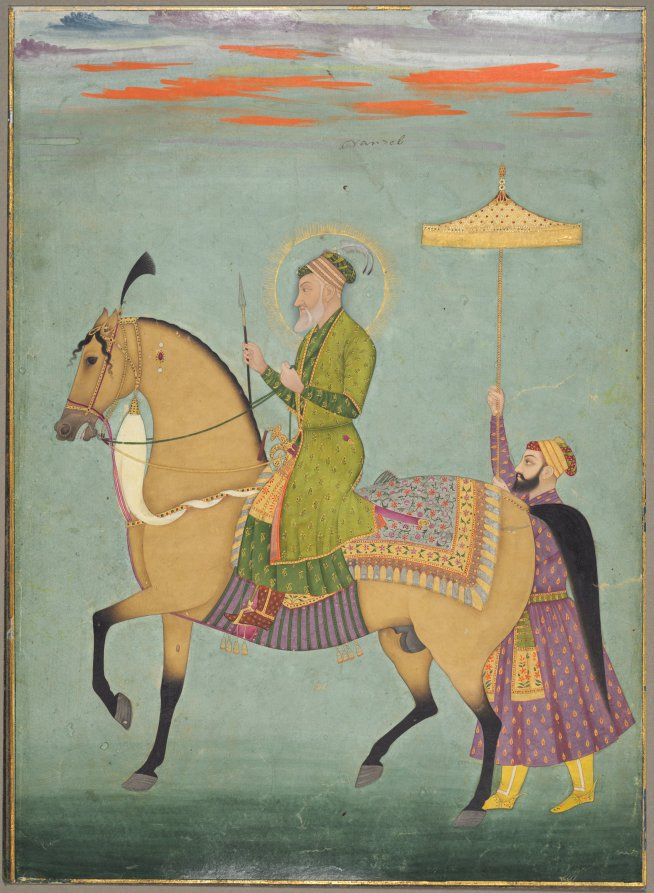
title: The Emperor Alamgir (reigned 1658–1707) on Horseback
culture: India, Mughal Dynasty (1526-1756)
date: c. 1690–1710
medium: Gum tempera, gold, and silver on paper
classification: Painting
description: The equestrian portrait genre was inspired by gifts of European prints and paintings to the Mughal court. The sixth Mughal emperor is portrayed on an elegant, decorated steed, ready for battle, holding a spear, and his sword at the ready. His attendant holds the symbolic parasol over him, which is a millennia-old emblem of kingship in India. Throughout his long reign he was primarily occupied with the conquest of the Deccan, which he ultimately achieved, expanding the Mughal Empire to its greatest geographical extent.